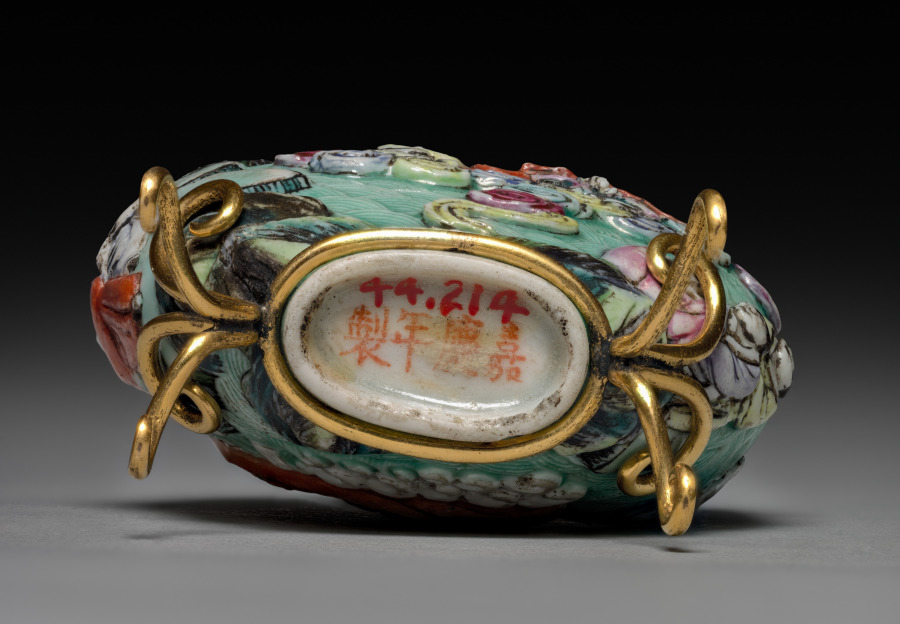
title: Flattened Ovoid Snuff Bottle with Stopper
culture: China, Qing dynasty (1644-1911), Jiaqing reign (1796-1820)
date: 1796–1820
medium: porcelain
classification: Ceramic